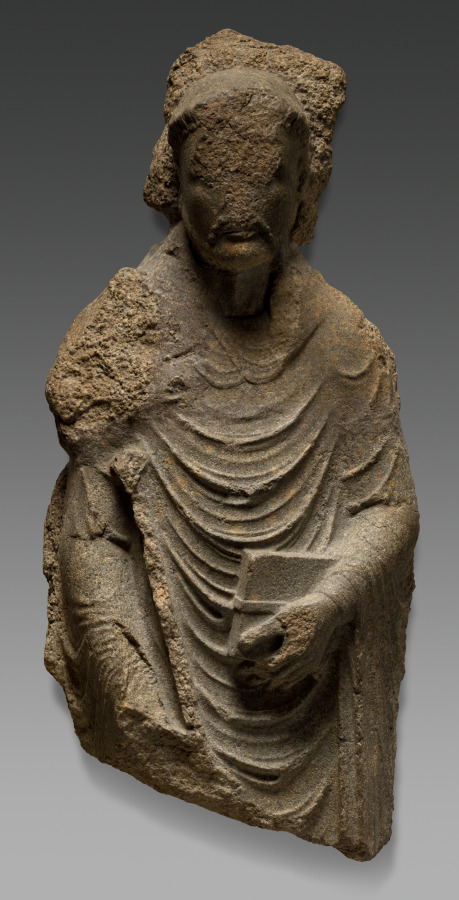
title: Effigy of an Abbot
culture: England, Dorset, 13th century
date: c. 1225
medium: Purbeck marble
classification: Sculpture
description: This funerary effigy represents one of the abbots of Cerne Abbey in Dorset, in southern England. His identity is unknown. Portrayed with tonsured (shaved) head and tightly curled beard, the abbot clasps a book in his left hand and traces of his crozier (staff) may be seen in his right hand—symbols of his office and pastoral authority. The figure is carved from "Purbeck marble," a limestone unique to the Purbeck Hills of Dorset. Very little remains of Cerne Abbey today, but it is known to have existed as early as the 9th century. The abbey was dissolved in 1539 by King Henry VIII during the English Reformation, at which time its buildings were razed to the ground. This is the only work of art that survives from the abbey and, though buffeted by time and history, retains much of its fine sculptural character. The sculpture has the additional distinction of being the only monument of its type in an American museum.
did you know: Researchers have been trying to identify which abbot is depicted here but so far have had no luck.